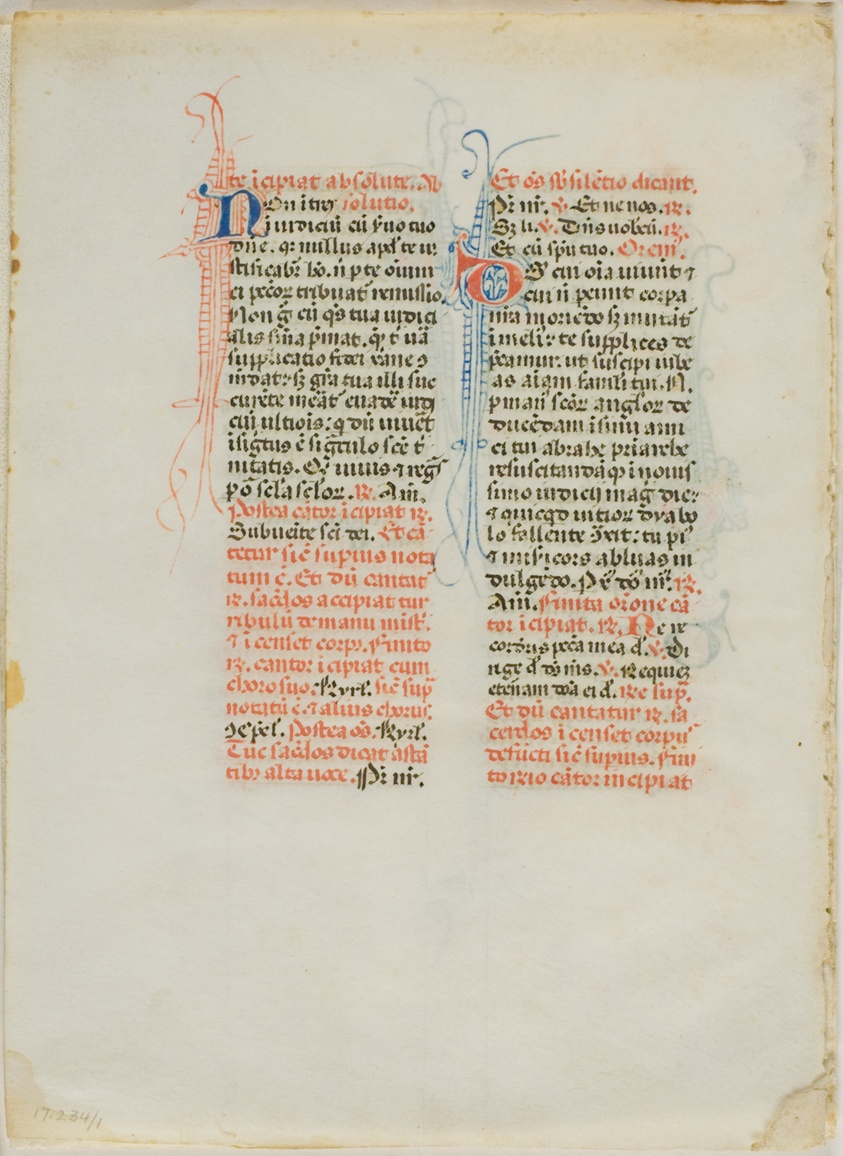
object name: Drawing and Watercolor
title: Illuminated Manuscript Leaf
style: medieval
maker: Italian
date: c. 1450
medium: Manuscript cutting with round gothic inscriptions in black, red and blue inks, and decorations in red and blue inks, on vellum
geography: Italy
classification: pen and ink drawings; manuscript; drawings (visual works); prints and drawing